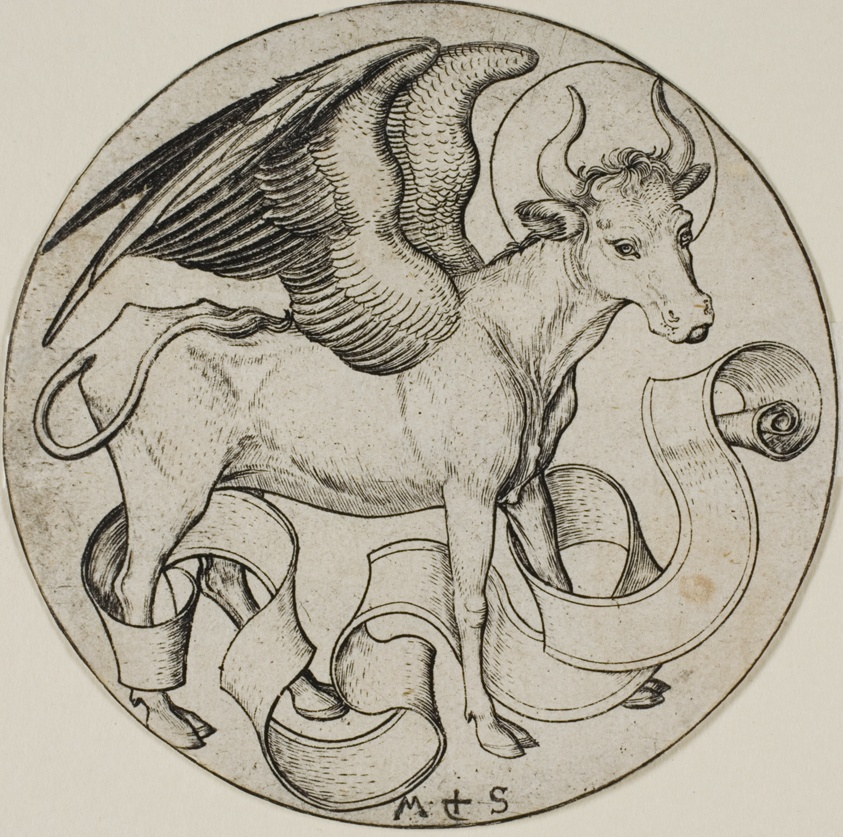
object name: Print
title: The Ox of St. Luke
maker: Martin Schongauer (German, c. 1430/50-1491)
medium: Engraving on paper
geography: Germany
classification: engraving; print; prints and drawing